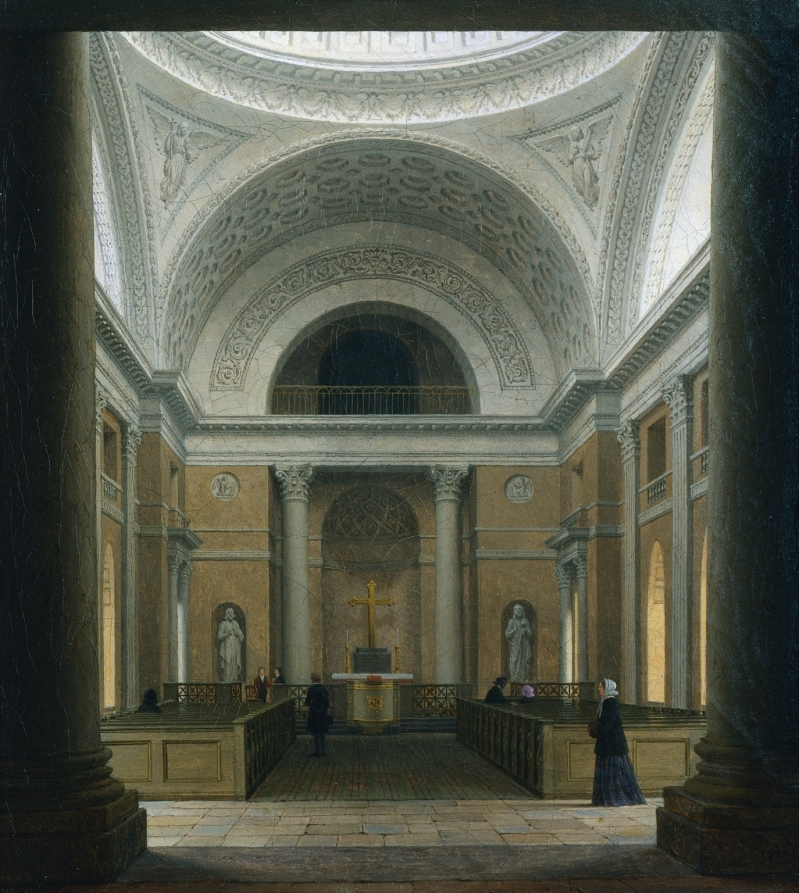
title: The Slotskirken of Christiansborg, Copenhagen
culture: Denmark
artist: Heinrich Hansen (Danish, 1821–1890)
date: c. 1850s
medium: oil on fabric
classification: Painting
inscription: Signed in black paint lower right corner: H. H.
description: Among the many important neoclassical buildings erected in Copenhagen during the 1800s was the Slotskirke or royal chapel, completed in 1826. Heinrich Hansen painted this sober, quiet view of the chapel's interior, carefully rendering its delicate shadows and patches of sunlight. Probably inspired by 17th-century Dutch paintings of church interiors, the artist accurately portrayed many of the building's features. The angels in the pendentives (the triangular areas beneath the circular dome) were carved by the great Danish sculptor Bertel Thorvaldsen (1768-1884).